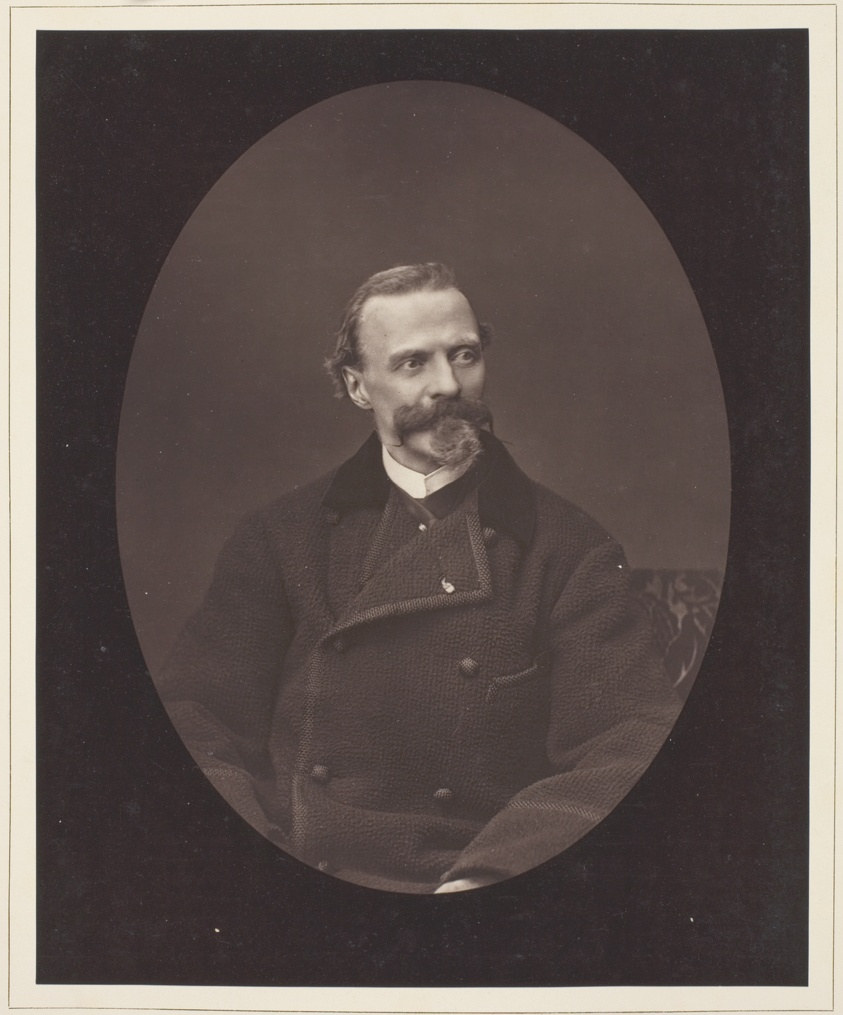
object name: Photograph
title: Cham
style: 19th century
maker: Ferdinand J. Mulnier (French, active 1860–1890)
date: c. 1876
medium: Woodburytype, from the periodical “Galerie Contemporaine Littéraire, Artistique” (1879), volume 8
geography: France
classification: woodburytype; photomechanical process; photography; photograph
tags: Collected by Hugh Edwards, Paris, Contemporaine Littéraire